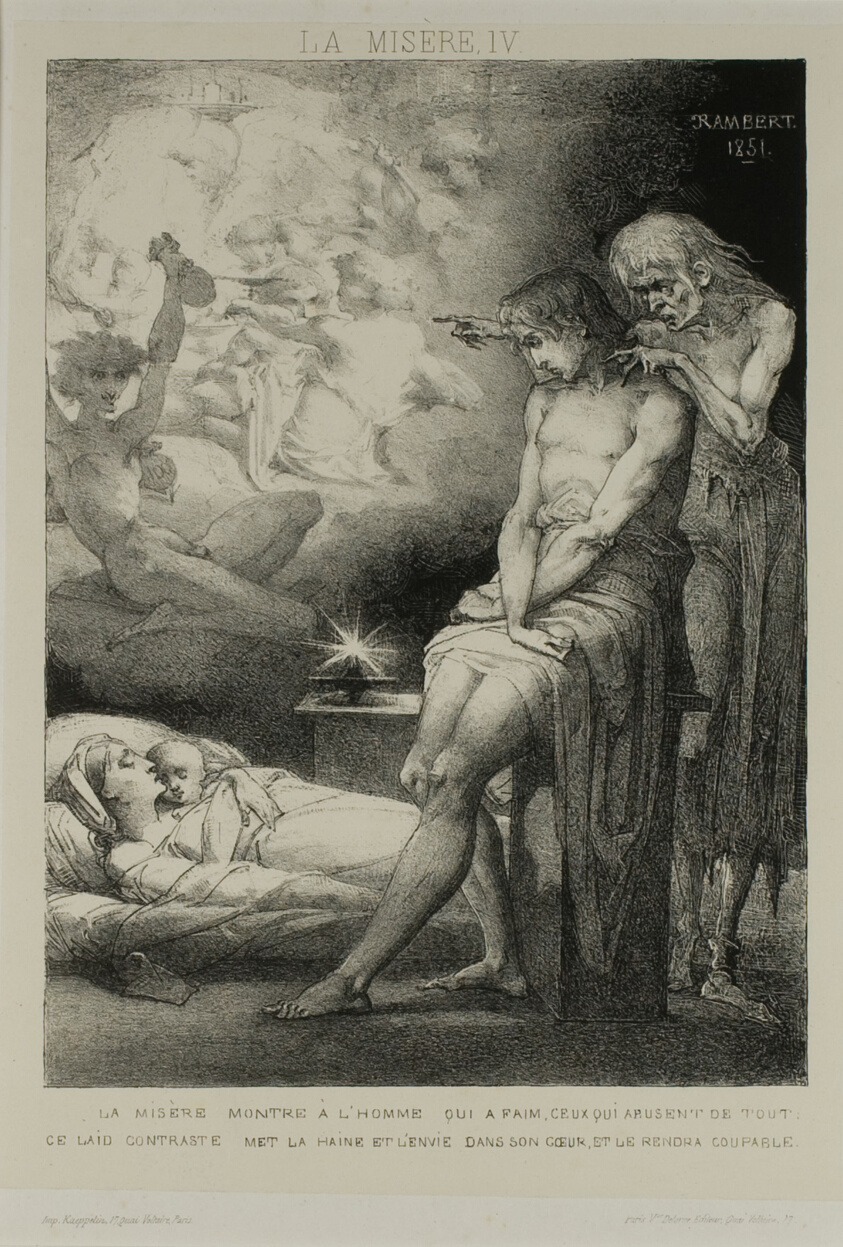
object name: Print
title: Plate Four from Misery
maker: Charles Rambert (French, active 1836–1867); printed by Kaeppelin; published by Victor Delarue (French, 19th century)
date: 1851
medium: Lithograph in black on cream China paper, laid down on ivory wove paper (chine collé)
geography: France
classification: lithograph; print; prints and drawing